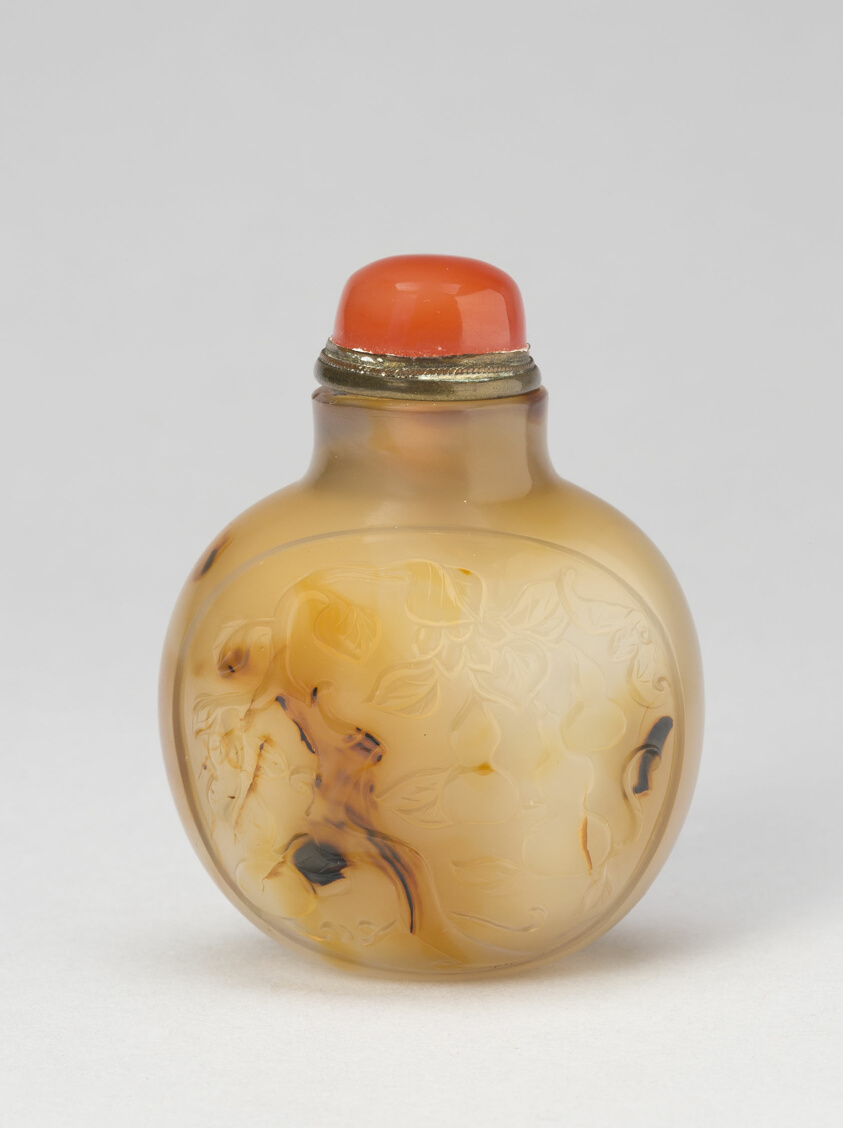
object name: Vessel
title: Snuff Bottle with Panels of Gourds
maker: China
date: Qing dynasty (1644–1911), 1770–1850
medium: Brown and grey agate with carved decoration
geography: China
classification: snuff bottle; asian art; vessel